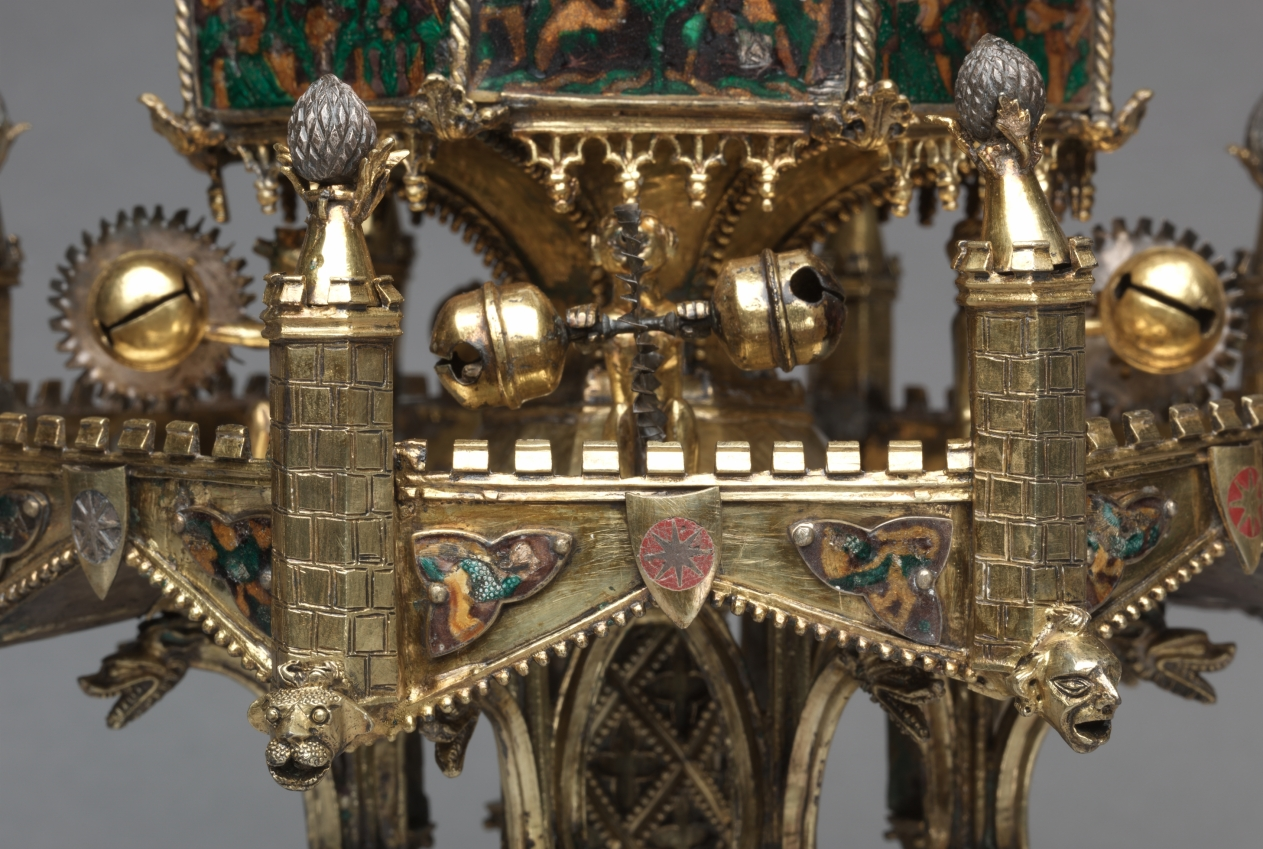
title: Table Fountain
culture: France, Paris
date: c. 1320–40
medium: gilt-silver and translucent enamels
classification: Metalwork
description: Conceptually and stylistically, this object is beyond all else a piece of Gothic architecture in miniature with vaults, pinnacles, columns, and traceried arches. Though the artist who created it is unknown, he was unquestionably inspired by the great Gothic buildings of his time. The table fountain is a three-tiered assembly combining cast elements with bent sheets of gilt-silver. To these have been attached a series of enamel plaques representing grotesque figures, some of which play musical instruments. Water wheels and bells were added to capture motion and sound. The rich detail, precious materials, and involved ornamentation of this deluxe object suggest it would have been expensive to produce and highly treasured by its original owner, someone of high status, and would have been deployed as an object of spectacle. This is the most complete example of its type known to survive from the Middle Ages. Medieval inventories reveal that small fountains like this, often taking various forms, and generally made from precious metals, once existed in large numbers, thus making the Cleveland table fountain an extremely rare object.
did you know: This fountain with its minute architectural details and finely made enamel plaques displayed the wealth and refinement of the owner as it entertained his guests. Imagine hearing the ringing of the tiny bells when this fountain was in use.